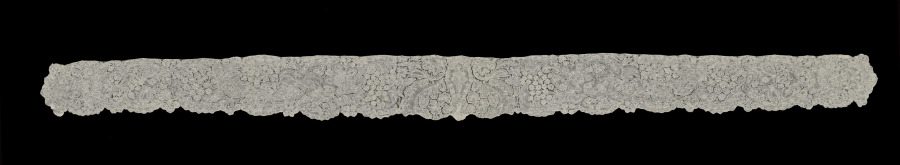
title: Lace Garniture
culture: Flanders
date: 1700s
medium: Linen: bobbin lace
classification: Lace